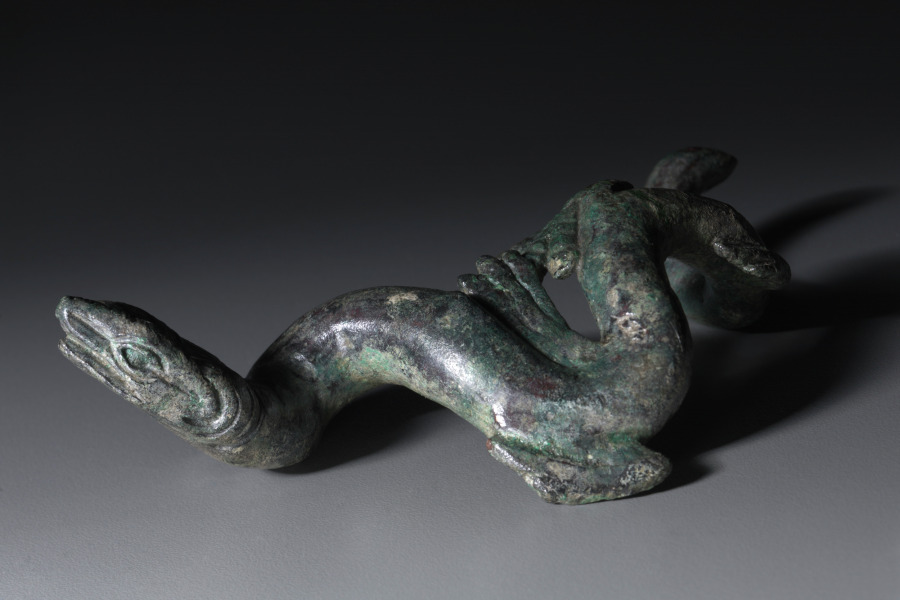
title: Detached Creature from the Cleveland Apollo: Apollo Sauroktonos (Lizard-Slayer) or Apollo the Python-Slayer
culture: Greece, Athens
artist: attributed to Praxiteles (Greek, Athenian, c. 400–330 BCE)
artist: or Follower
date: c. 350–200 BCE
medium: bronze, copper and stone inlay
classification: Sculpture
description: Both snakelike and lizardlike in appearance, the creature has a scaly head and four small feet. These are attached asymmetrically to its long and sinuous body, some with carefully delineated toes, others less detailed. The smallest foot falls behind a line bisecting the creature, where radiography shows a pin joining two separately cast sections. Although the bronze of the front and back halves is quite similar, the front half shows greater porosity (air bubbles). Perhaps the original back half was damaged during casting, necessitating a new or re-casting of that portion of the creature, with a smaller, relocated fourth leg.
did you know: Despite its small size, the creature was cast in two solid parts.